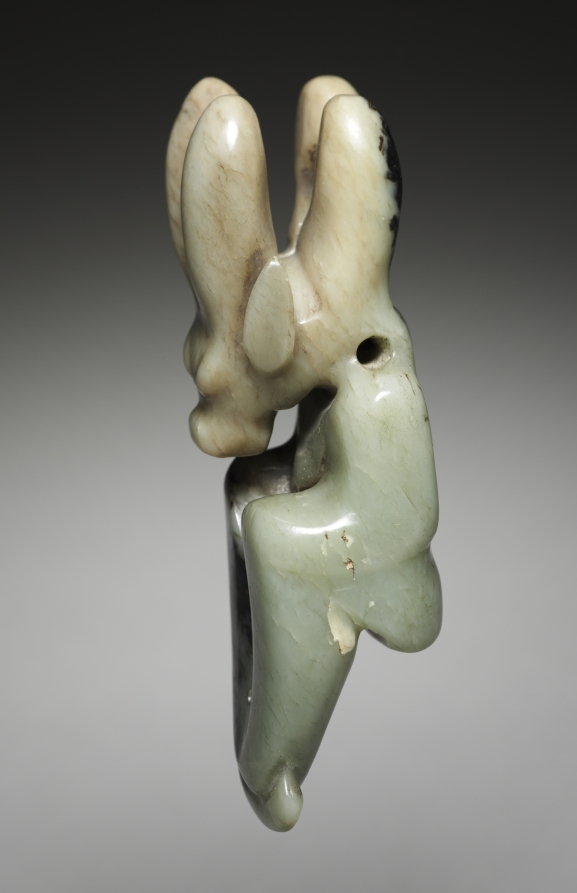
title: Amulet in the Form of a Seated Figure with Bovine Head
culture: Northeast China, Neolithic period, probably Hongshan culture (4700–2920 BCE)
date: c. 4700–2920 BCE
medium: jade (nephrite)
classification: Jade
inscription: There are two paper labels on the back of the jade pendant: one partial label with Chinese characters and one with the typed number "150".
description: With a bovine head and four horns, this seated figurine was a powerful ritual and shamanic symbol. Drill holes above its shoulders form two interconnected perforations for suspension, suggesting that the jade was originally used as a pendant, presumably by the shaman performing the tasks of journeying to and communicating with the supernatural realms.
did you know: CMA daringly acquired this masterpiece without knowing exactly what it was. Only after Chinese archaeologists started excavating similar jades in Northeast China could it be attributed to the Hongshan culture.